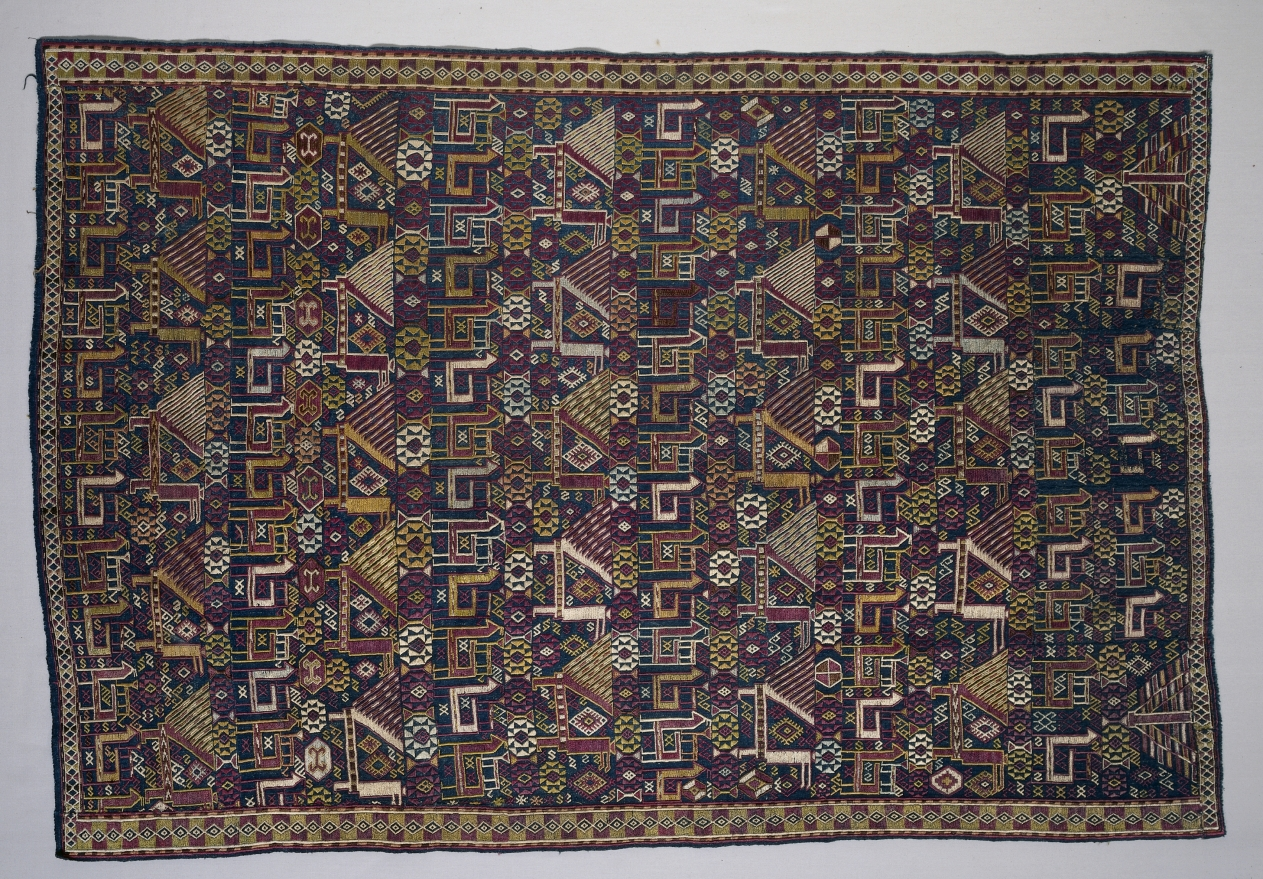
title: Cover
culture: Iran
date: early 1900s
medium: Silk on cotton tabby ground, embroidery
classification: Embroidery